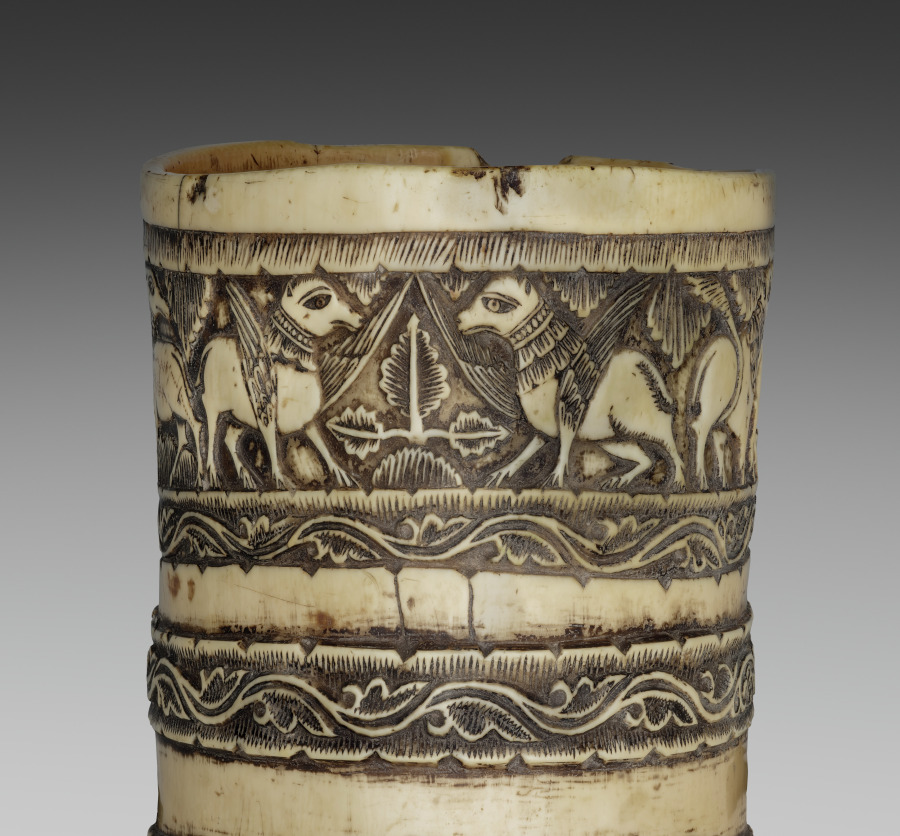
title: The So-called Horn of Saint Blaise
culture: South Italy or Sicily, 12th century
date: 1100–1200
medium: ivory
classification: Ivory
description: This oliphant--a carved elephant tusk in the shape of a hunting horn--was likely carved in an Arab ivory workshop in South Italy or Sicily. It is masterfully shaped, with a series of six carved bands, the outer ring depicting scenes from a hunt. The earliest surviving inventory of the church of Saint Blaise from 1482-85 lists an oliphant decorated with silver rings and precious stones and known as the "Horn of Saint Blaise." By the 17th century, Saint Blaise was reputed to have used this very horn to summon the faithful to worship.